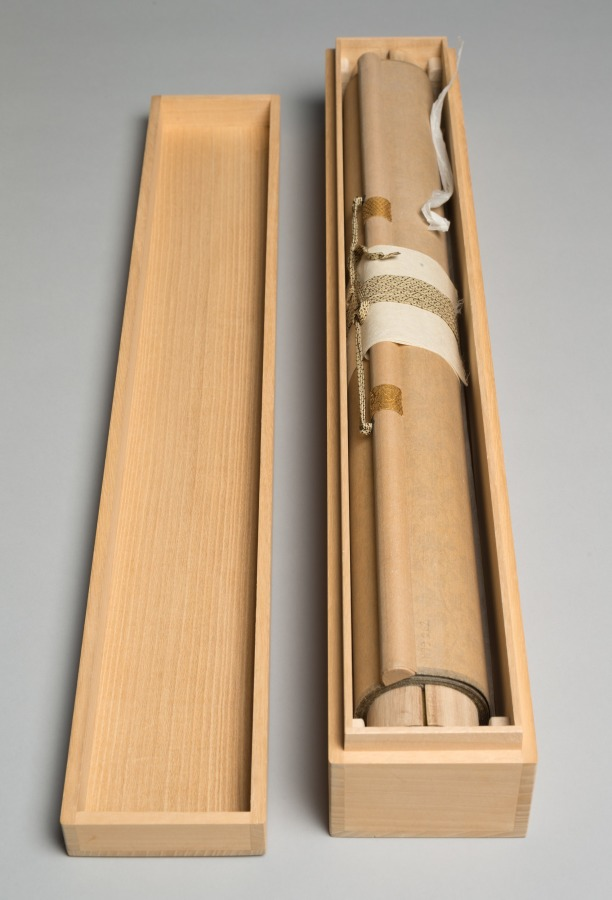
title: Mandala of the Four Deities of Mt. Kōya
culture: Japan, Muromachi period (1392–1573)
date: 1500s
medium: hanging scroll, ink, color and cut gold foil on silk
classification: Painting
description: The two kami, or deities, at the top of this painting are Kariba Myōjin and Niu Myōjin. They inhabit Mount Kōya and are described as son and mother. They are shown here as courtiers, with Kariba in Japanese-style court robes and Niu in robes modeled after court garments of the Tang dynasty. The two kami seated beneath are Kehi Myōjin, portrayed as a lady holding a whisk, and the youthful Miyajima Myōjin, with his hair drawn up in loops, playing a lute (biwa). Hōjō Masako (1157–1225), the wife of the first Kamakura shogun (leader) Minamoto Yoritomo (1147–1199), invited them to Mount Kōya.